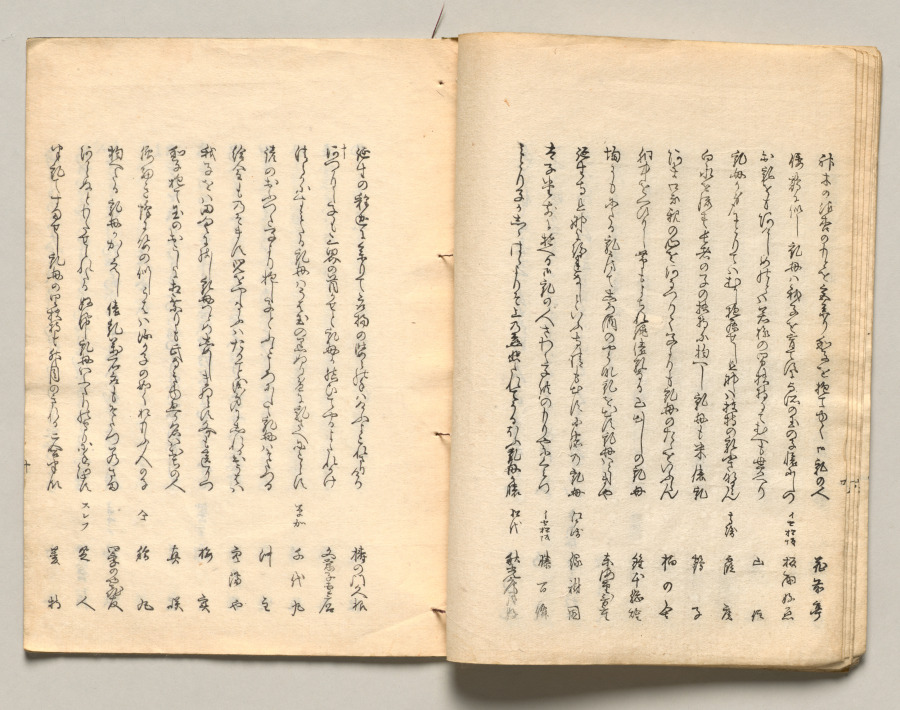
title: Spread Eighteen from Volume Four of People of Japan in Light Verse (Kyōka)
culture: Japan, Edo period (1615–1868)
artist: Utagawa Hiroshige (Japanese, 1797–1858)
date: 1857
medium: Woodblock-printed book; ink and color on paper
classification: Bound Volume